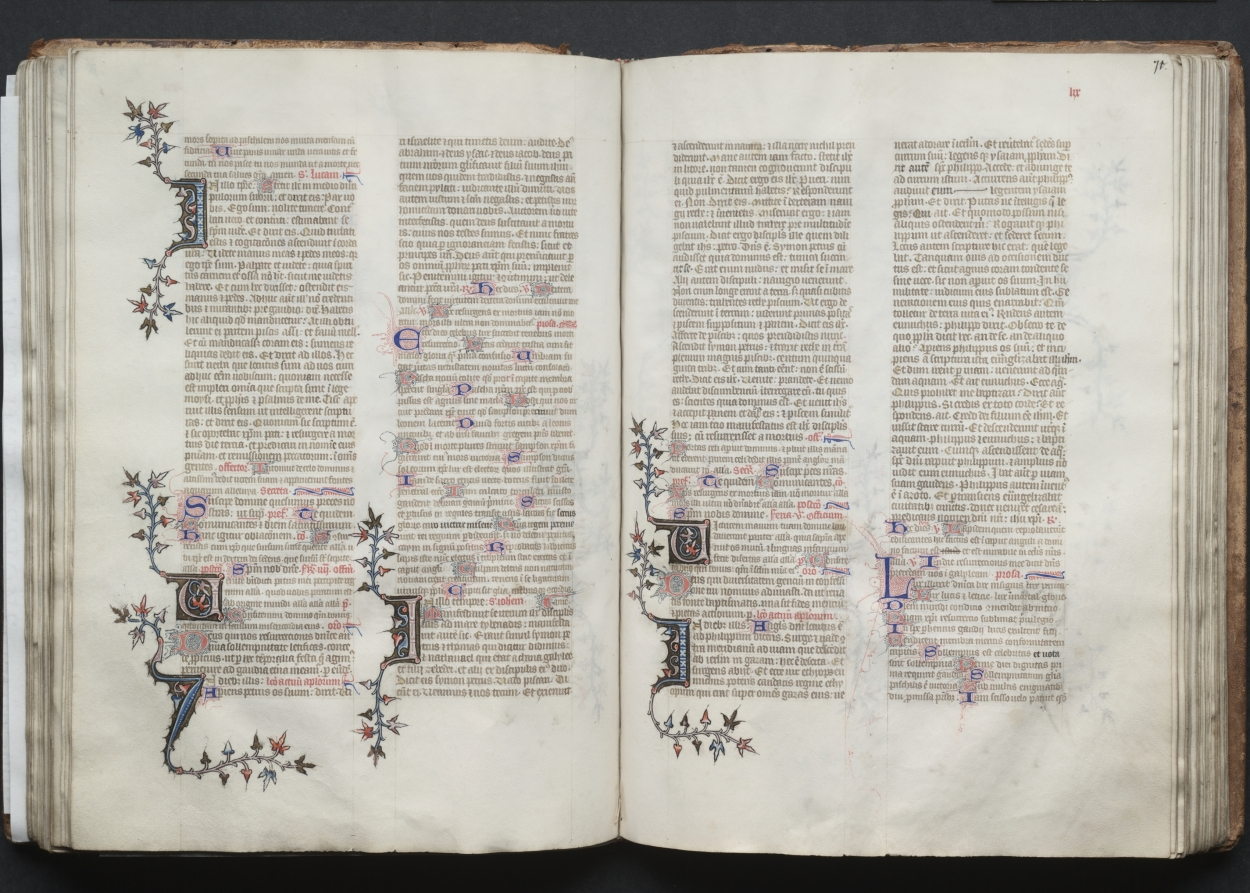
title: The Gotha Missal: Fol. 71r, Text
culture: France, Paris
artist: Master of the Boqueteaux (French)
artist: and Workshop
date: c. 1375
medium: ink, tempera, and gold on vellum; blind-tooled leather binding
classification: Bound Volume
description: The style and quality of this manuscript's decoration is typical of deluxe Parisian books made for aristocratic or royal patrons. Most of the book's decoration appears to be the work of the Master of the Boqueteaux, an artist active at the court of King Charles V (died 1380). His style was apparently shared by a number of book illuminators working in and around Paris. It is very possible that the Gotha Missal belonged to Charles V, but is not provable because the manuscript has no royal portraits and lacks a colophon. Given the book's magnificent decoration, however, it would seem that it was produced for a Valois prince, if not for the king himself. The manuscript receives its name from the German dukes of Gotha, its later owners.